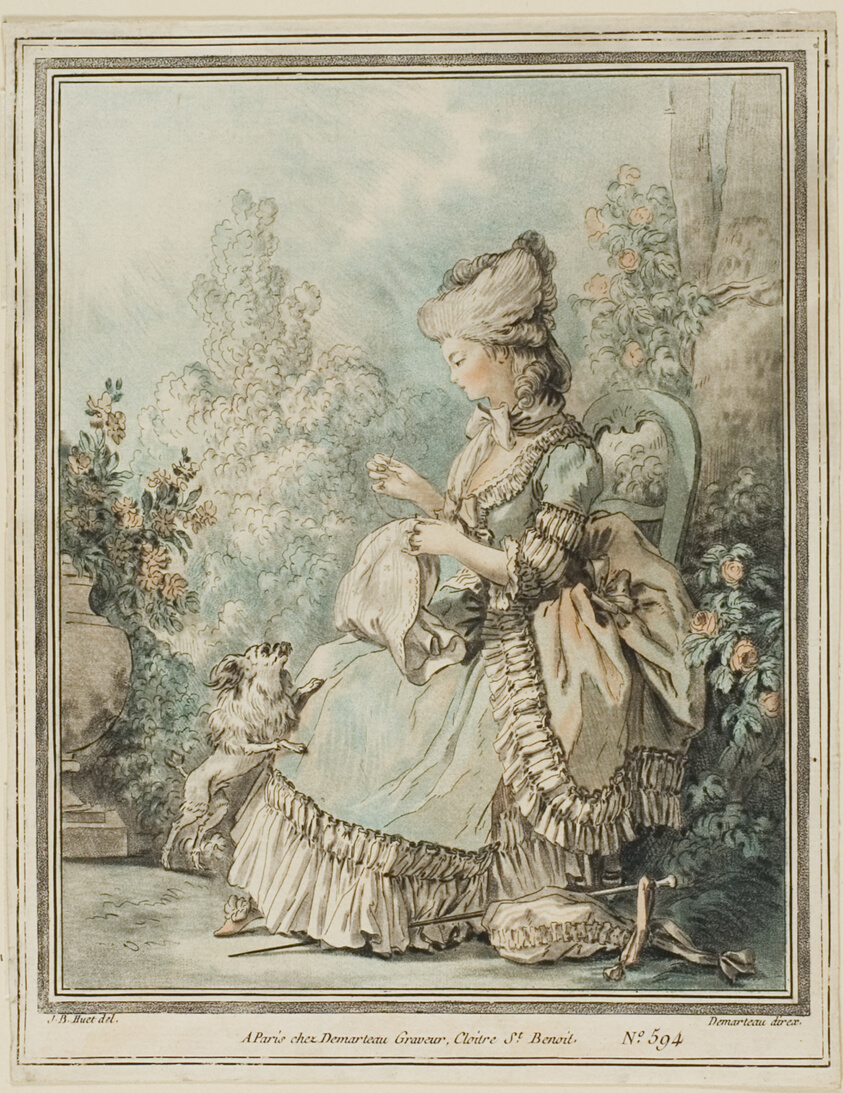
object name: Print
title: The Dog's Repast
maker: Gilles-Antoine Demarteau (French, c. 1750-1802); after Jean-Baptiste Huet (French, 1745-1811)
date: 1778/79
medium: Color crayon-manner engraving, with hand-coloring, on ivory laid paper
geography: France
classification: crayon manner print; engraving; print; prints and drawing